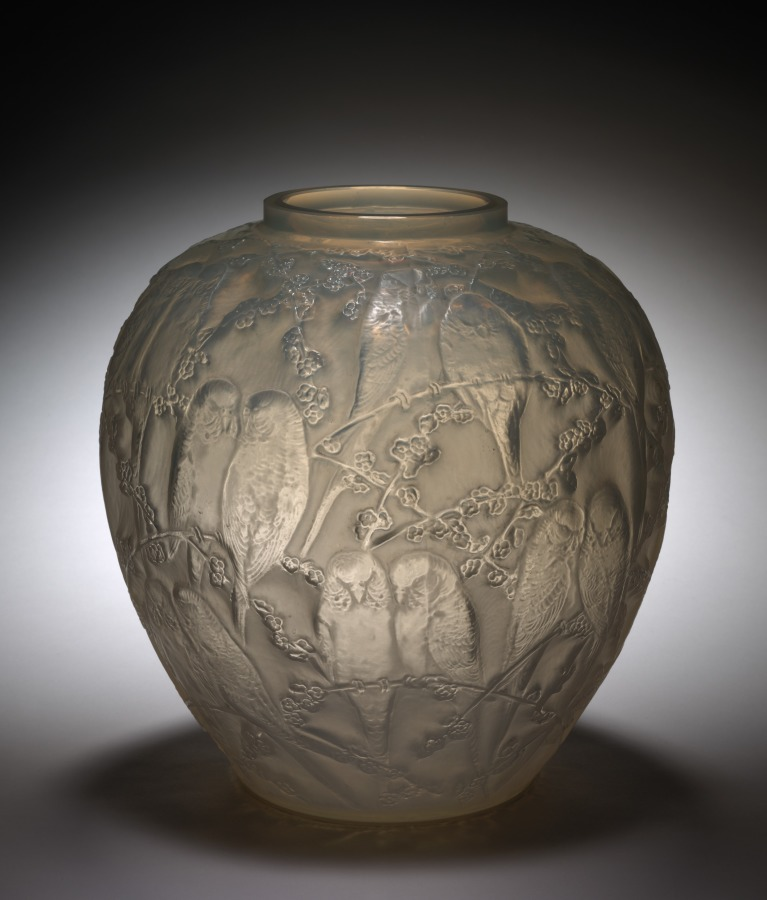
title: Vase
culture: France, 20th century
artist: firm of René Lalique (French, 1860–1945)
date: c. 1930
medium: glass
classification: Glass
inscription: signature from mold on bottom: "R. LALIQUE"; etched on bottom: "FRANCE" and "11594."